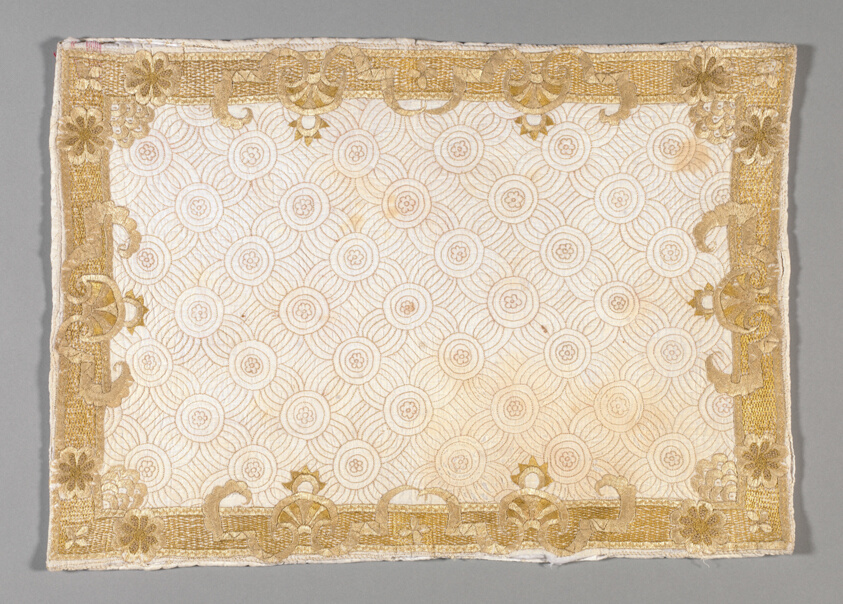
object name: Textile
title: Pillow Sham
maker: England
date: c.1720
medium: Cotton, plain weave; underlaid with linen, plain weave; embroidered with silk floss and silk yarns in back, herringbone, running, and satin stitches; laid work, couching, and French knots;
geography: England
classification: textile; needlework (visual works)